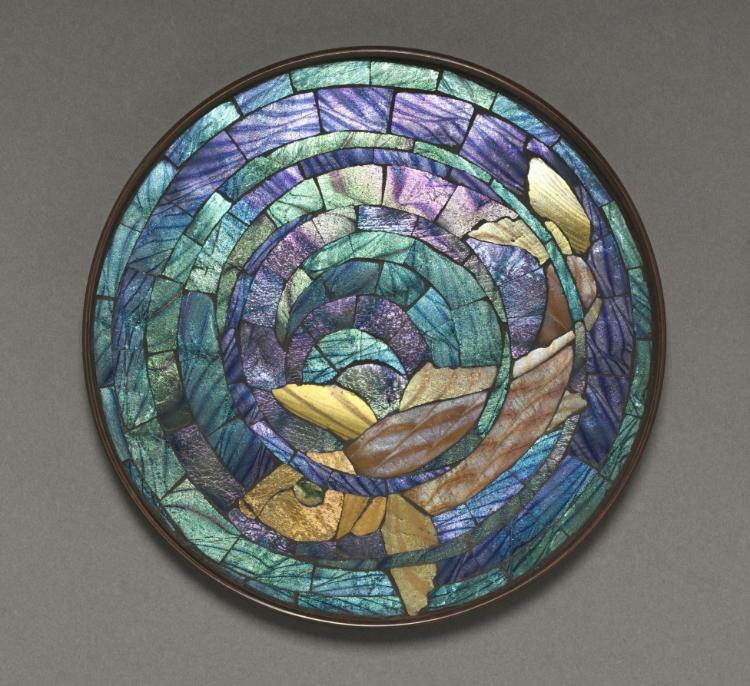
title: Trivet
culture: America, New York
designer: attributed to Clara Wolcott Driscoll (American, 1861–1944)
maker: Tiffany Studios (United States, New York, 1902–32)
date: c. 1902–9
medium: Glass, mosaic, bronze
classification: Miscellaneous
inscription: TIFFANY STUDIOS/NEW YORK/282820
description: By 1900, Louis Comfort Tiffany had expanded his empire by increasing the firm’s production of “fancy goods,” including inkstands, candlesticks, clocks, small boxes, desk sets, tea screens, and other functional objects. Along with the array of artistic glass designs from his factory in Corona, Queens, works in ceramic, bronze, other metals, and even jewelry abounded. These smaller, more affordable luxury items were designed with as much thought to artistry as the great stained glass windows and lamps through which the firm enjoyed unrivaled success.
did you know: Being careful not to waste material, Louis Comfort TIffany's artisans reused small shards of leftover glass in small mosaic fancy goods such as trivets and trays.